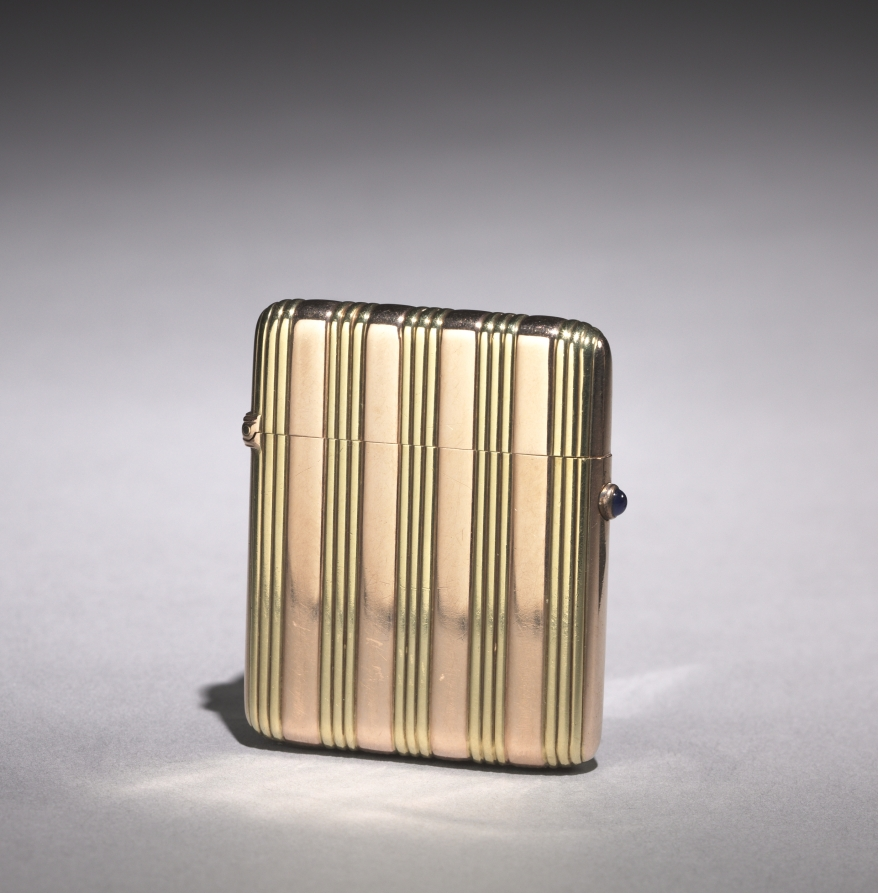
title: Match Case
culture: Russia, St. Petersburg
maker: House of Fabergé (Russian, 1842–1918)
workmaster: Anders Johan Nevalainen (Finnish, 1858–1933)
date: c. 1900–1910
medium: pink and yellow gold, cabochon sapphire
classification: Miscellaneous